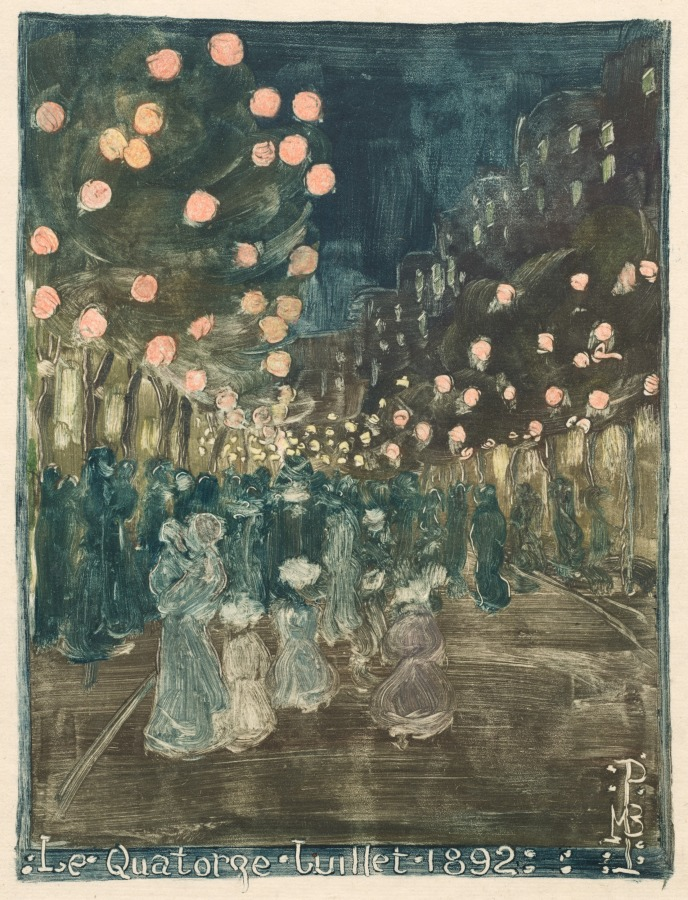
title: Bastille Day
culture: America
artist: Maurice Prendergast (American, born Newfoundland [now Canada], 1858–1924)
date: 1892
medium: color monotype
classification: Print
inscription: inscribed, at bottom in image: Le Quatorze Juillet 1892; initialed, at lower right in image: MBP [in monogram]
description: Maurice Prendergast began to make monotypes in the early 1890s while living in Paris, where he was influenced by Edgar Degas's use of the technique. Prendergast focused on scenes from daily life, such as this depiction of crowds filling the streets of the French capital on the country's national holiday. He used layers of blue and black ink to evoke the shadowy tones of nighttime and orbs of bright pink to suggest the artificial light of lanterns illuminating the boulevards.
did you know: This print is one of the few works that can be dated to Maurice Prendergast's early years in Paris.